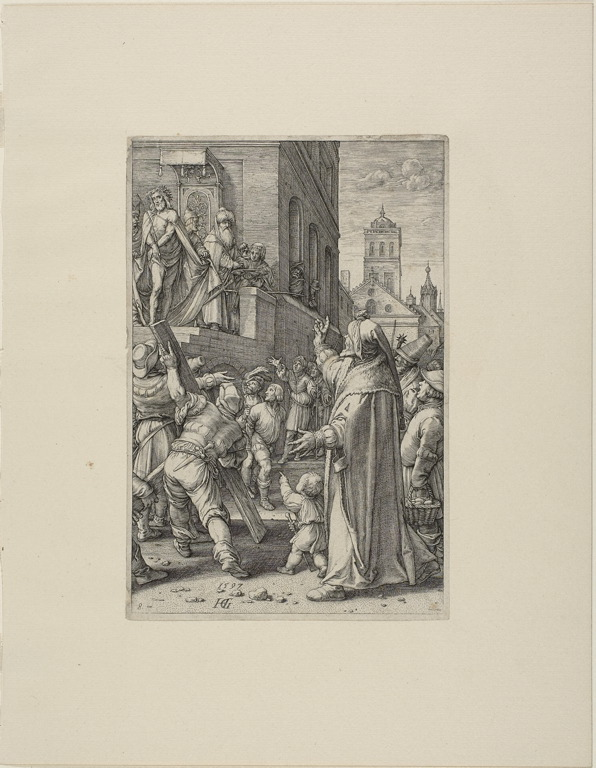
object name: Print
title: Ecce Homo, plate eight from The Passion of Christ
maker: Hendrick Goltzius (Dutch, 1558-1617)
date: 1597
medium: Engraving in black on cream laid paper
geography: Netherlands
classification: engraving; print; prints and drawing